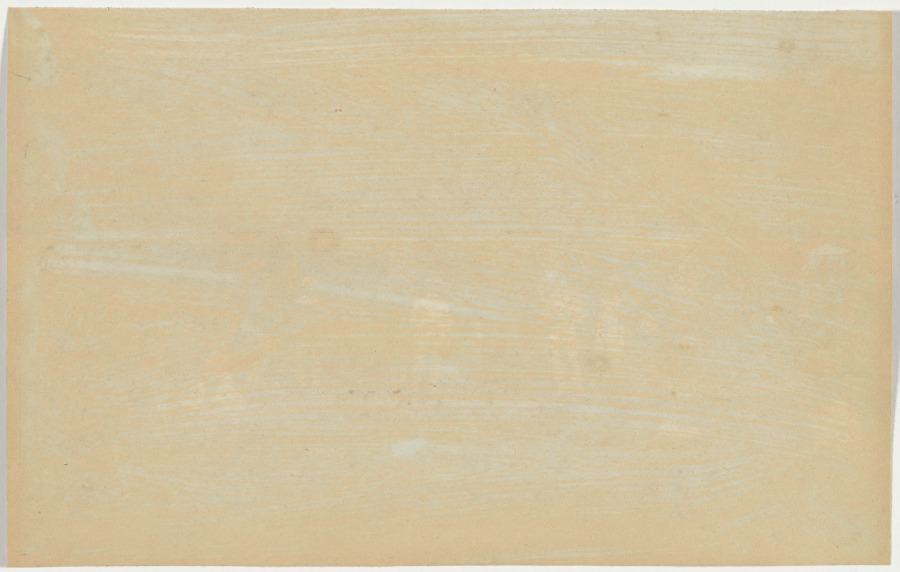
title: Major Sparks, Indore, July 86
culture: India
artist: Raja Deen Dayal (Indian, 1844–1905)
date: 1886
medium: albumen print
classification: Photograph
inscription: No visible inscriptions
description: Imported into India in great numbers by the British, horses were used for both transportation and sports such as riding, polo, and racing. Caring for the animals fell largely to Indian servants. Captions on the photographs’ mounts specify the owners of these animals (note that Major Sparks also has a monkey and pet deer). However, none of the Indian servants is identified. Nor would they have received a copy of the photograph because of their low social status, which was far below that of Deen Dayal.